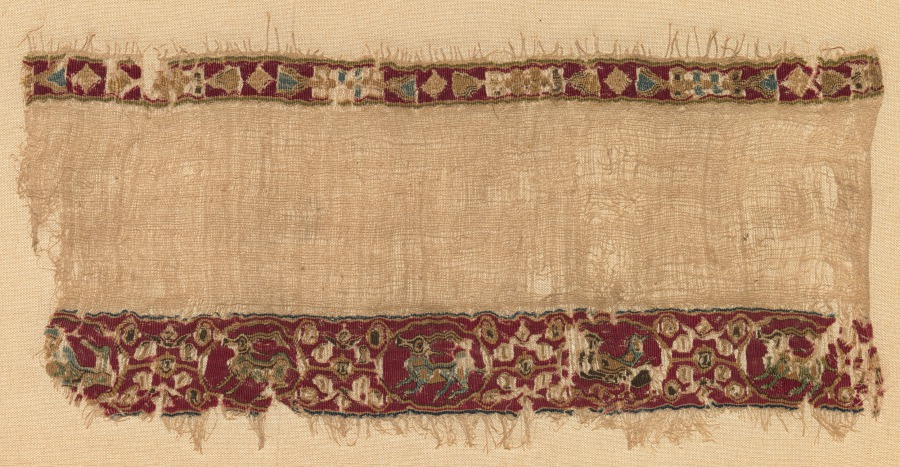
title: Fragment of a Tiraz-Style Textile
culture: Egypt, Fatimid period, late 11th century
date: late 1000s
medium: tabby ground with inwoven tapestry ornament; linen and silk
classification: Textile